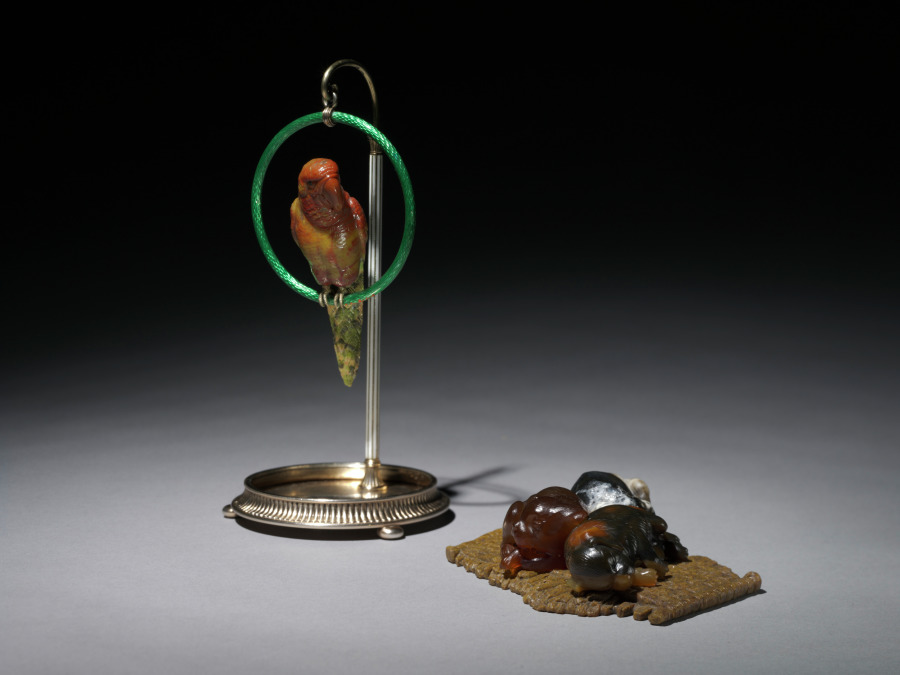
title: Parrot on a Perch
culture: Russia, St. Petersburg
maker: House of Fabergé (Russian, 1842–1918)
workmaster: Mikhail Evlampievich Perkhin (Russian, 1860–1903)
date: 1896–1903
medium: silver, enamel, jasper, agate, emeralds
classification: Miscellaneous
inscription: 88, Kokoshnik, tester's initials (in Cyrillic) [assay mark for St. Petersburg, 1896-1908]; initials of workmaster Mikhail Perkhin (in Cyrillic); Fabergé (in Cyrillic); 6817 scratched.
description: In creating luxurious accessories for a desk or tabletop, Fabergé often used native hardstones such as multicolored agate and jasper, green nephrite, pink rhodonite, and rock crystal found in the Ural Mountains of western Russia. By paying careful attention to the unique colors and textures of the stones, Fabergé and his craftsmen brought them to life, turning milky agate into a begging poodle or green and black jasper into this parrot sitting on a perch. The use of native materials also promoted Russian nationalism, which appealed greatly to the tsar and his family.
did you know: Tsar Nicholas and his cousins in the British royal family kept parrots and parakeets throughout their many palaces.